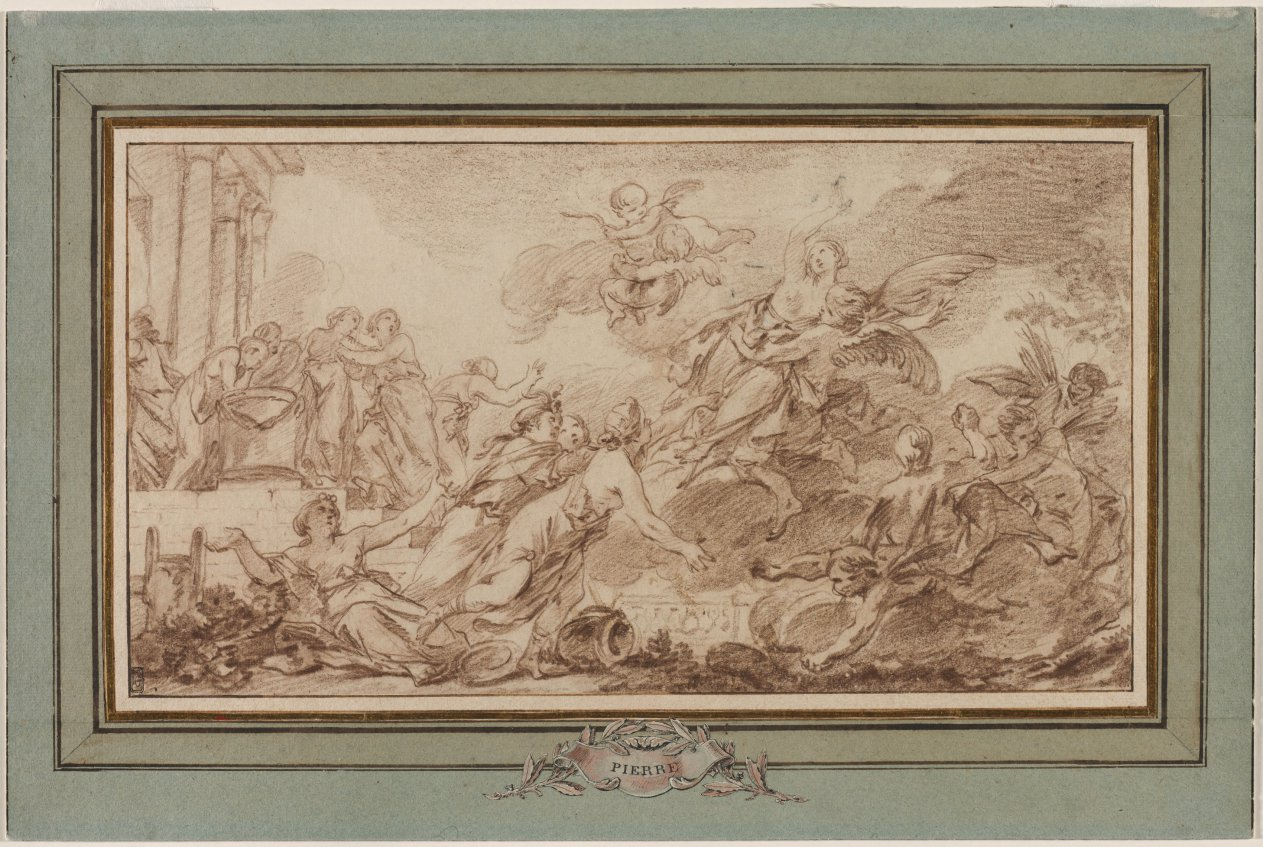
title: Boreas Abducting Oreithyia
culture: France, 18th century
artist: Jean-Baptiste-Marie Pierre (French, 1713–1789)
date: c. 1755–1760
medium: red chalk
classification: Drawing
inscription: Signed in brown ink with the initial 'P' lower left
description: Pierre took the subject of this drawing from the celebrated work the Metamorphoses by the Roman poet Ovid (43 bc-ad 17), which recounts the loves of the gods and goddesses of antiquity. Oreithyia, daughter of Erectheus, king of Athens, so inspired the passion of the god of the north wind, Boreas, that he descended to the earth to kidnap her. Although this subject was not especially common, Ovid was a favorite source for painters during the 1700s. Pierre was influenced here by a tapestry designed by François Boucher showing the same scene.